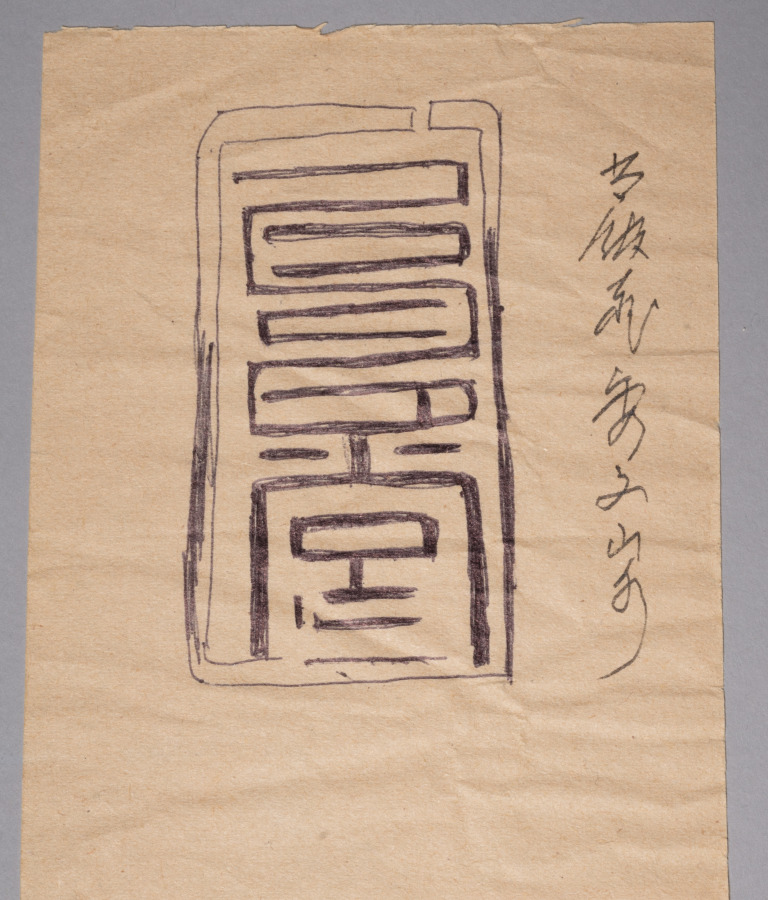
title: Calligraphy with Willow and Swallows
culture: Japan, Muromachi period (1392–1573)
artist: Ikkyū Sōjun (Japanese, 1394–1481)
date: 1400s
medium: hanging scroll, ink on paper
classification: Painting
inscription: How many days has it rid itself of the crow’s cloth? It knows not!/ Lovely is its body so nimble and neat./ Neither men of wealth, courtly position, or power can come close to the unfettered, noble swallow!/ With the coming of spring, it seems to be flying about, dancing around the grass hut of the foolish Priest. signed: Unkasō Isshi Tōkai jun Ikkyū shi ga ippitsu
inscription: outer box inscribed: Ikkyū Ōshō Enshi-zu Jigasan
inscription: inner box side lid inscribed: Showa 50 (1975), November by Tayama Honan with kao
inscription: Inner box side lid inscribed: Ikkyū Ōshō Bokuseki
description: The famed Buddhist monk Ikkyū is best remembered for his calligraphy. Calligraphic conventions of his time called for brushwork that did not vary much in style from character to character. However, as Ikkyū’s lines progress, his brushwork wanders between standard script and a sort of shorthand, marked by an uneven distribution of ink and a reduction of the characters to only the most necessary strokes. Ikkyū’s direct communication of emotion via brushwork became characteristic of the works produced by monks affiliated with the temple Daitokuji later in the Edo period (1615–1868).